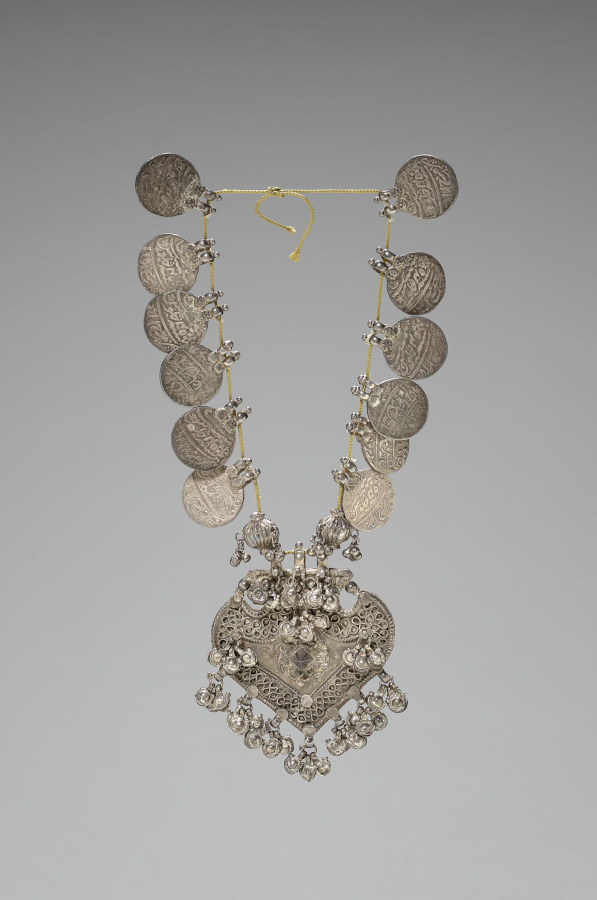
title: Necklace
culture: India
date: 1800s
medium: silver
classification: Jewelry